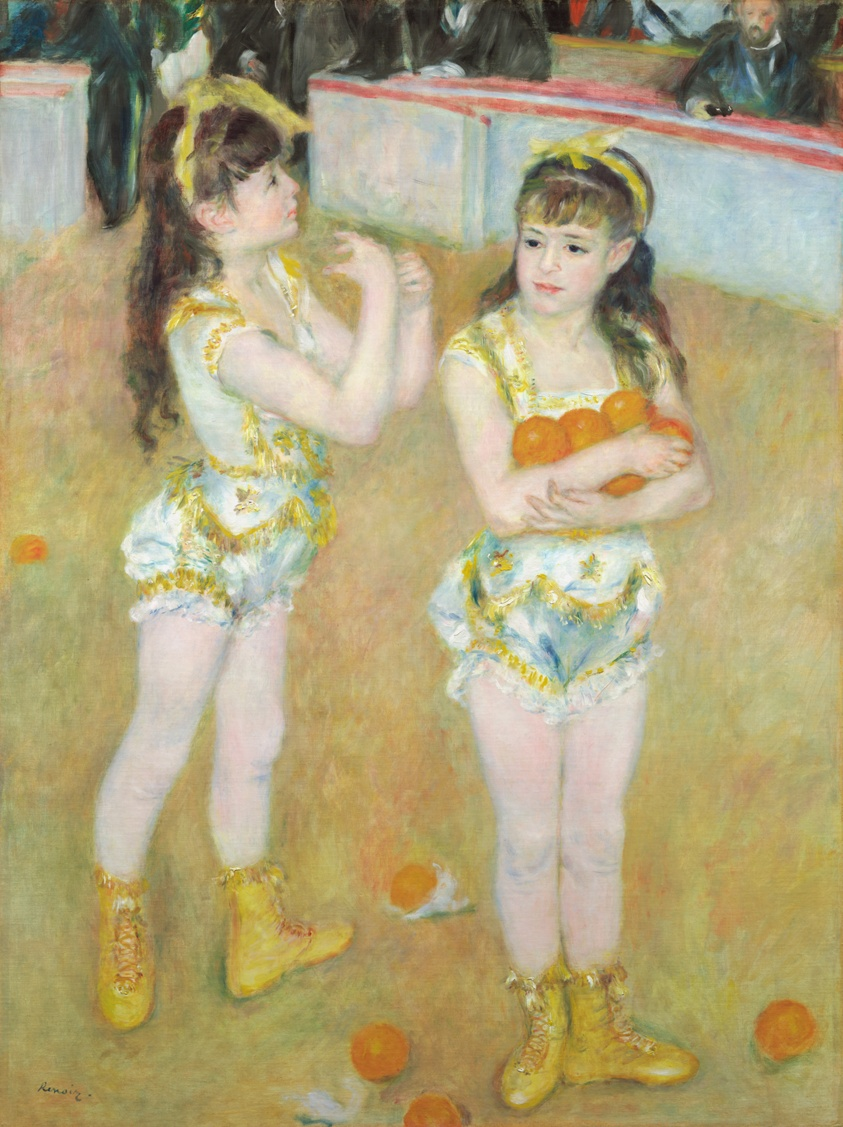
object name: Painting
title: Acrobats at the Cirque Fernando (Francisca and Angelina Wartenberg)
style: Impressionism, 19th century, nineteenth century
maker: Pierre-Auguste Renoir (French, 1841–1919)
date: 1879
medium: Oil on canvas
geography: France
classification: painting; france; french; oil on canvas; oil paintings (visual works); paint; european painting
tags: Century of Progress, public, costume, entertainment, girls, portraits, work, leisure, children, world's fairs, Chicago World's Fairs, uniforms, acrobats, fruit, oranges